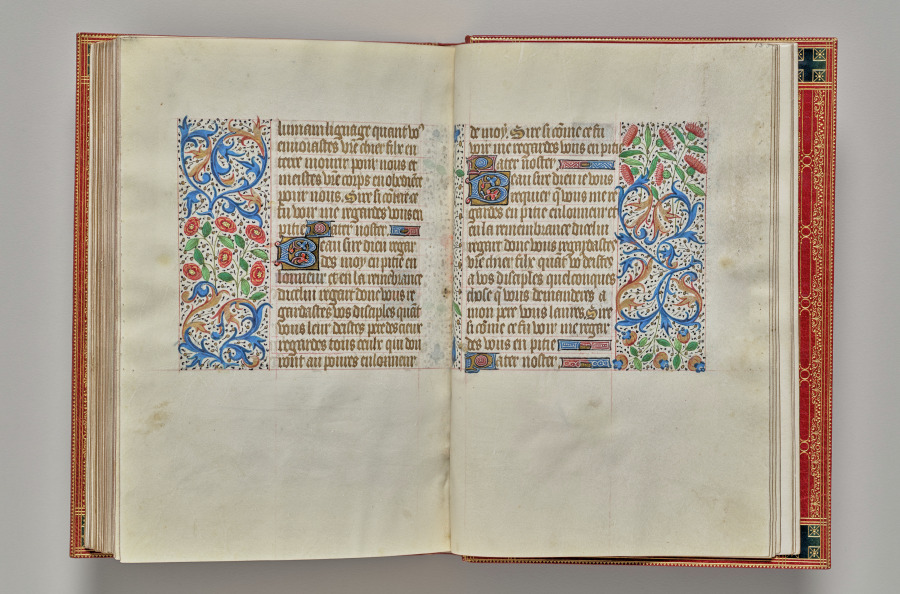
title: Book of Hours (Use of Rouen): fol. 153r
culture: France, Rouen, 15th century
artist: Master of the Geneva Latini (French, active Rouen, 1460–80)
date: c. 1470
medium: ink, tempera, and gold on vellum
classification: Bound Volume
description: In the late 1400s and early 1500s Rouen was an established and important center of book production. The city’s cathedral had a wealthy chapter that spent large sums of money to commission books and to maintain its extensive library. The stationers and booksellers would have likely been concentrated in or near the cathedral precinct. This artist, named after a manuscript now in Geneva, was Rouen’s principal illuminator during the second half of the 1400s.